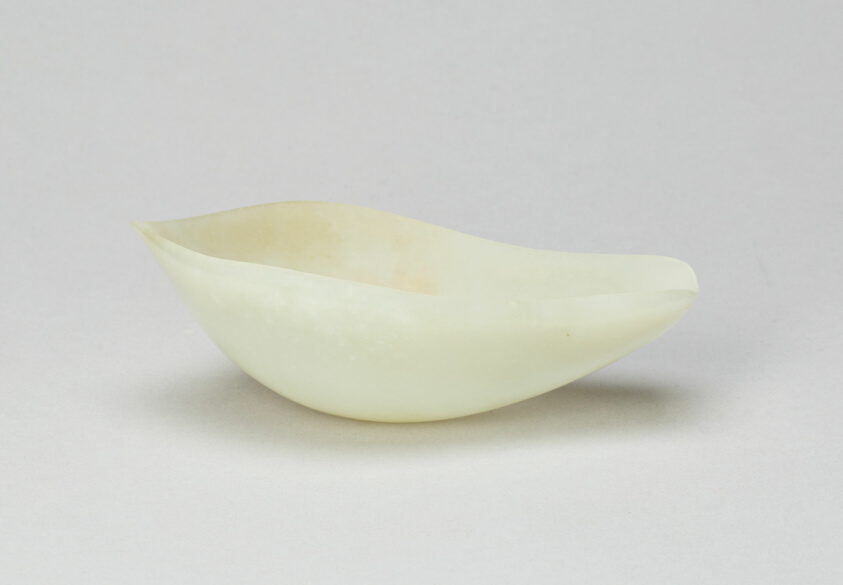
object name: Vessel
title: Spoon inthe Form of a Lotus Leaf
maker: China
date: Ming dynasty (1368–1644), late 16th/early 17th century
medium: Jade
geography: China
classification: jade; asian art